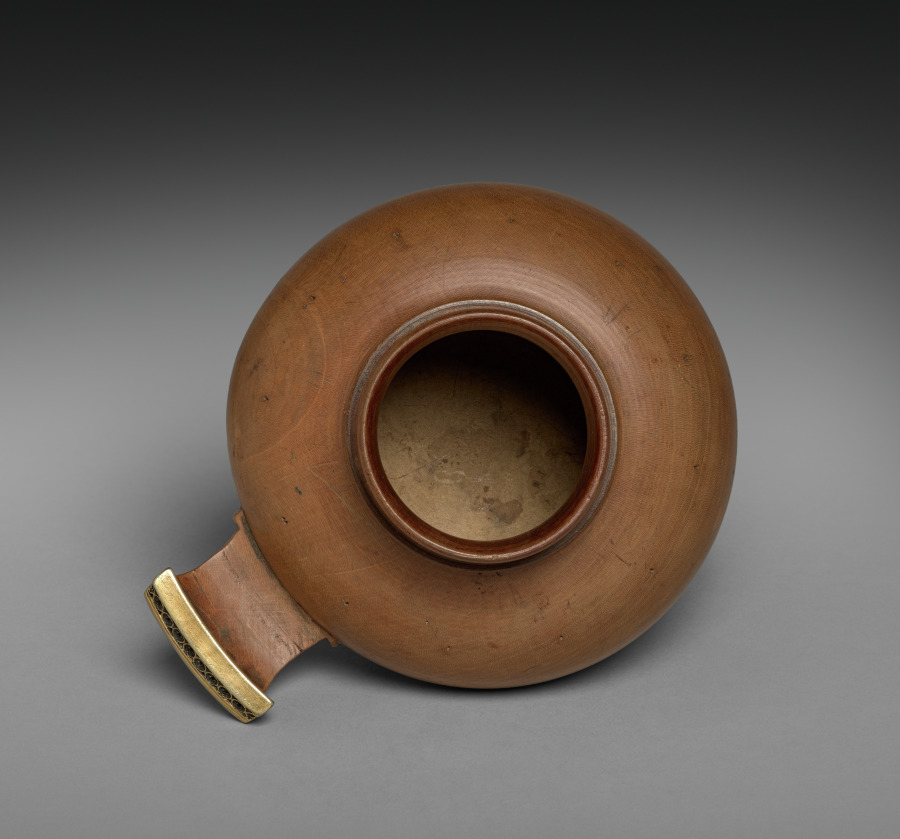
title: Double Cup (Mazer)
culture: Germany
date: c. 1530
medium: maple wood with gilt-silver mounts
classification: Wood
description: A characteristic form of drinking vessel made of close-grained wood, especially maple, was developed in Germany as early as the thirteenth century. It consisted of a larger cup with a foot and a handle and a smaller cup on top. The upper one served as a lid but could also be removed and used as a separate drinking vessel. In this example the smaller upper cup is inset with a memorial portrait medallion of Albrecht Dürer made in the year of his death, 1528. The medal is the work of Matthes Gebel who was active in Nuremberg and Augsburg as a medallist from 1523 to his death in 1574. The reverse of the medal is set into the base of the larger lower cup.